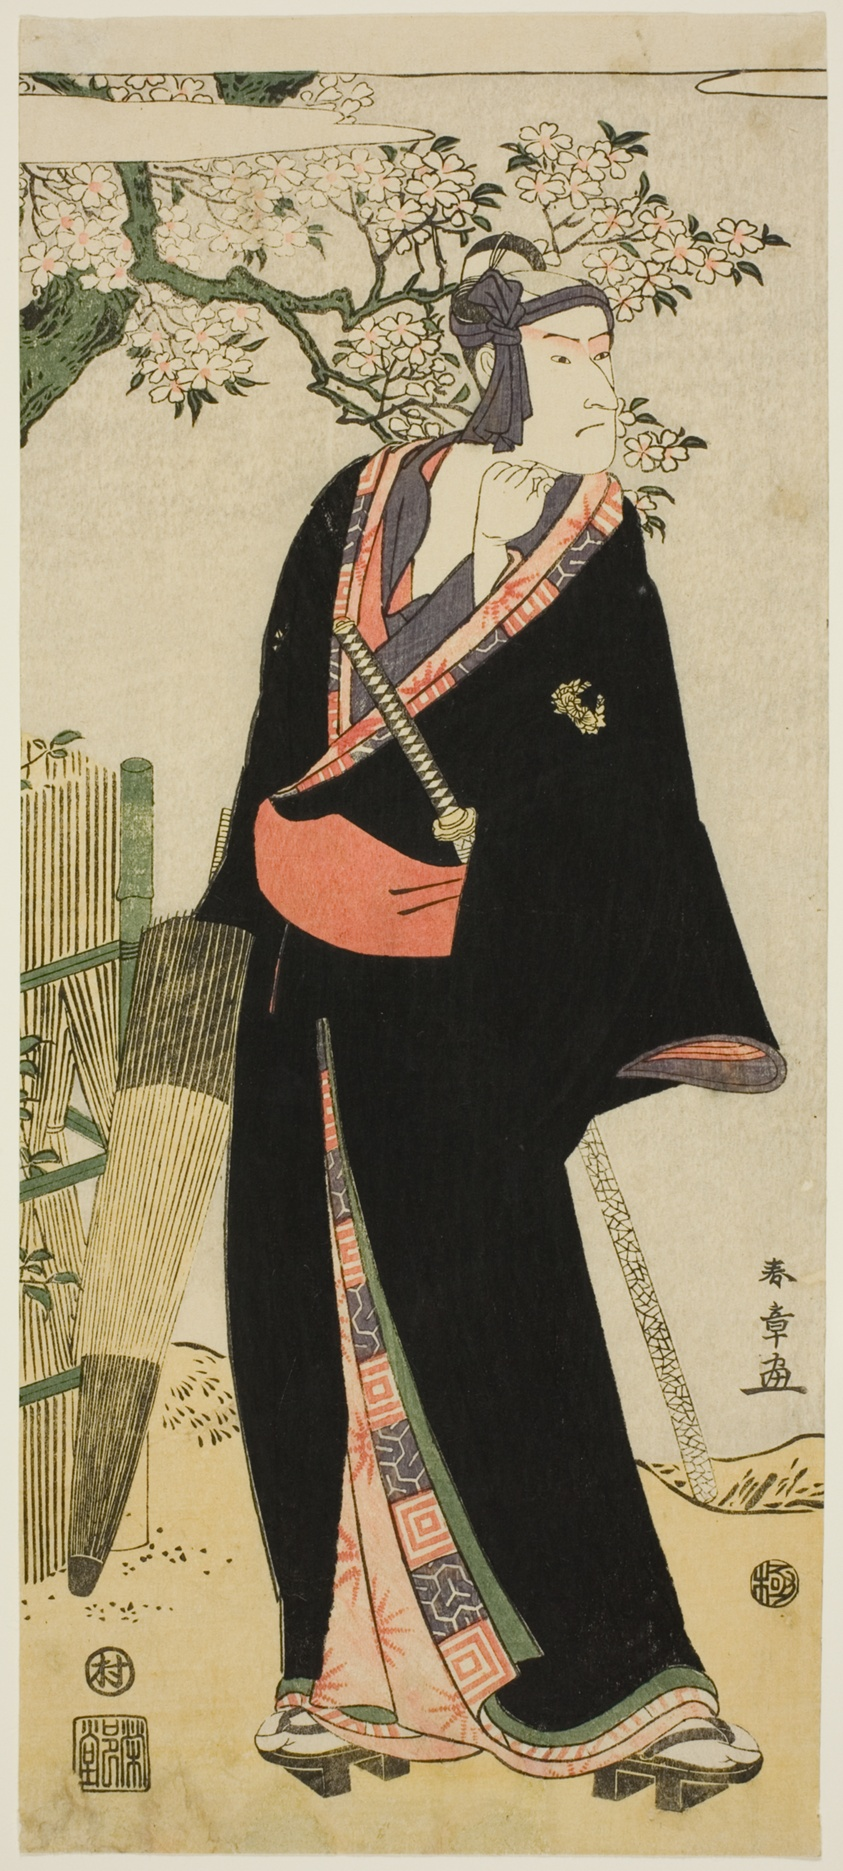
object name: Print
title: Actor Ichikawa Komazô II as Sukeroku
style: Japanese (culture or style)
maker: Attributed to Katsukawa Shun’ei; Japanese, 1762–1819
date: About 1793 or about 1797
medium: Color woodblock print; hosoban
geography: Japan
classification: woodblock print; print; asian art